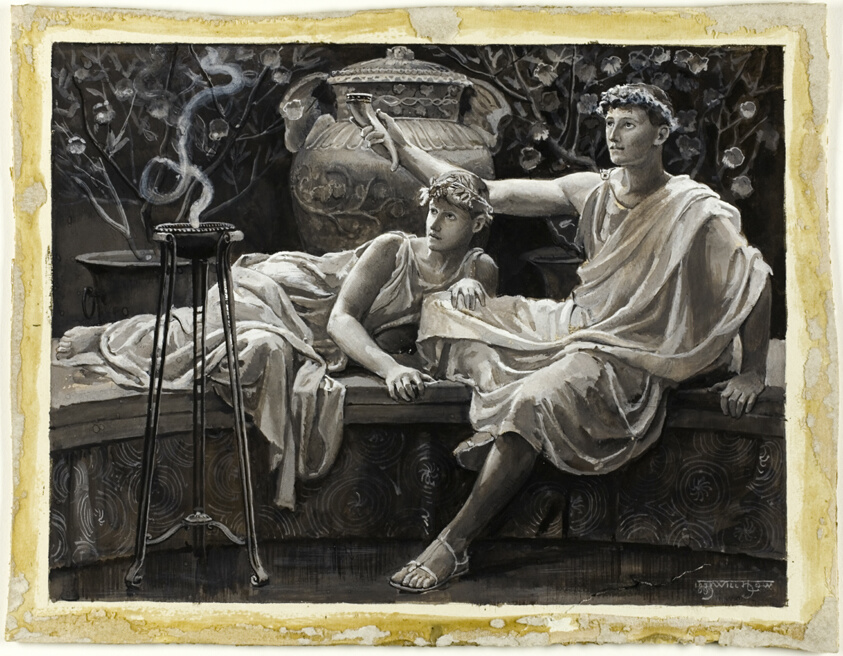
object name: Drawing and Watercolor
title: Checking His Love Trance, a Cup He Took Full Brimm'd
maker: Will Hicock Low (American, 1853-1932)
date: 1885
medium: Black, gray and white gouache on cream wood-pulp laminate board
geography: United States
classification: drawings (visual works); prints and drawing